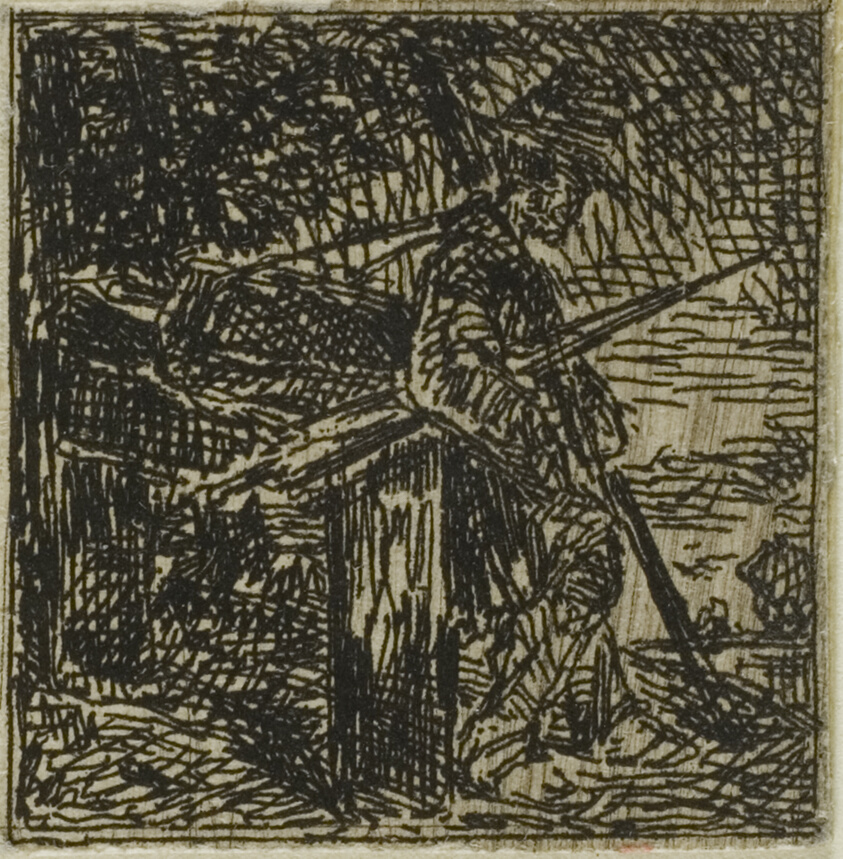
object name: Print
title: Vagabond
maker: Charles Émile Jacque (French, 1813-1894)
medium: Etching on ivory wove paper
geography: France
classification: etching; print; prints and drawing